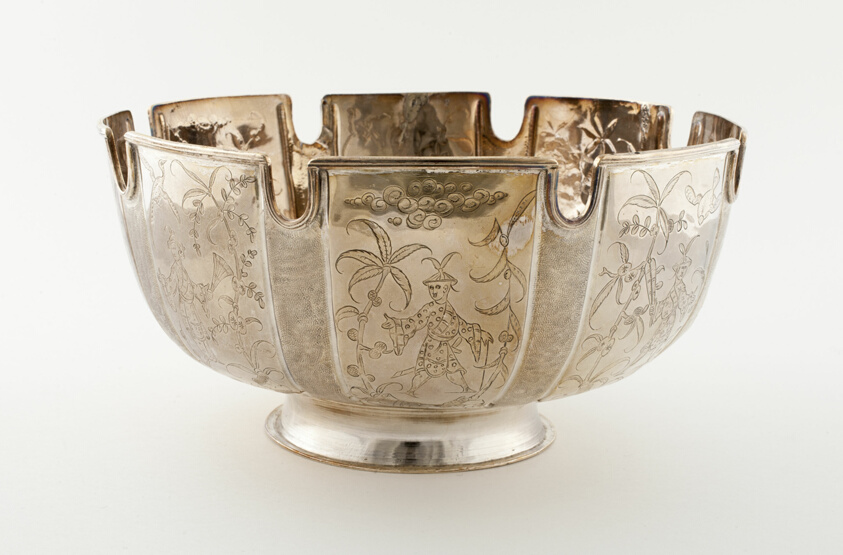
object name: Metalwork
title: Monteith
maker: Marked DB; London, England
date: 1685–86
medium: Silver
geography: London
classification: silver; metalwork; european decorative arts